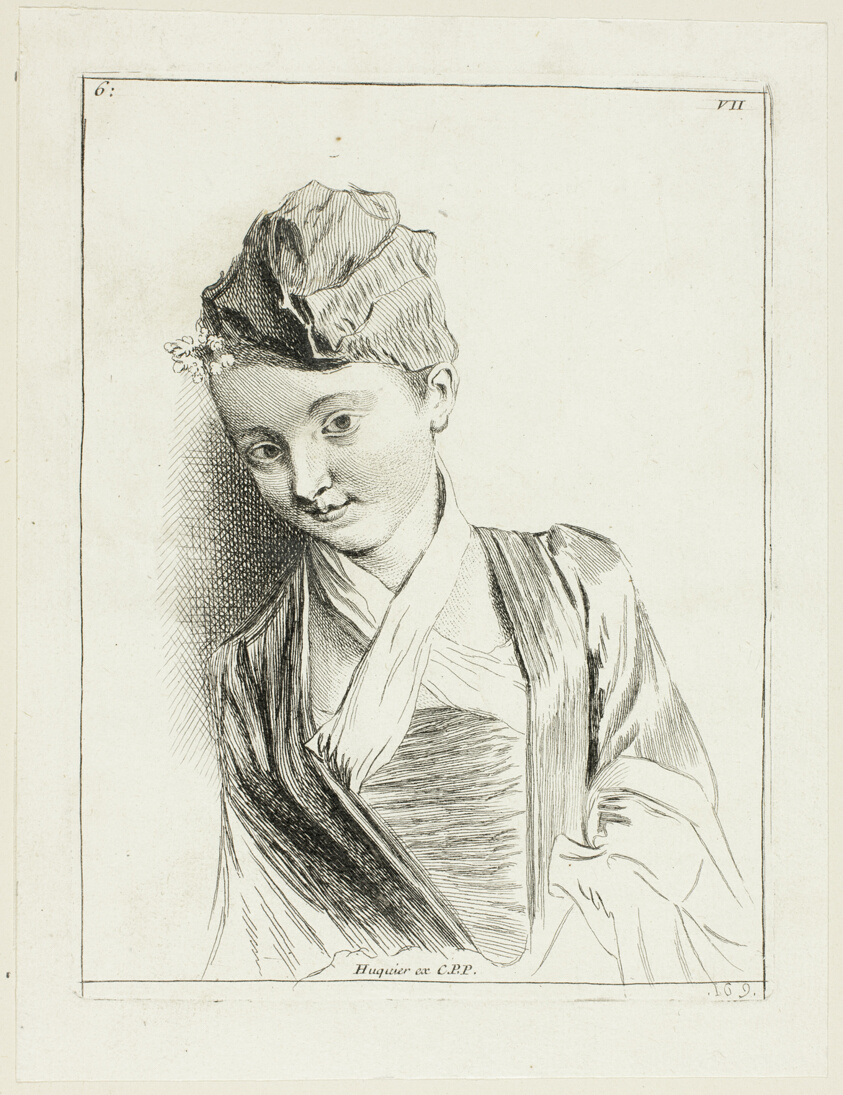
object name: Print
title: Woman's Head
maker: Anne Claude Philippe Caylus (French, 1692-1765)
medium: Etching and engraving on paper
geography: France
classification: etching; print; prints and drawing